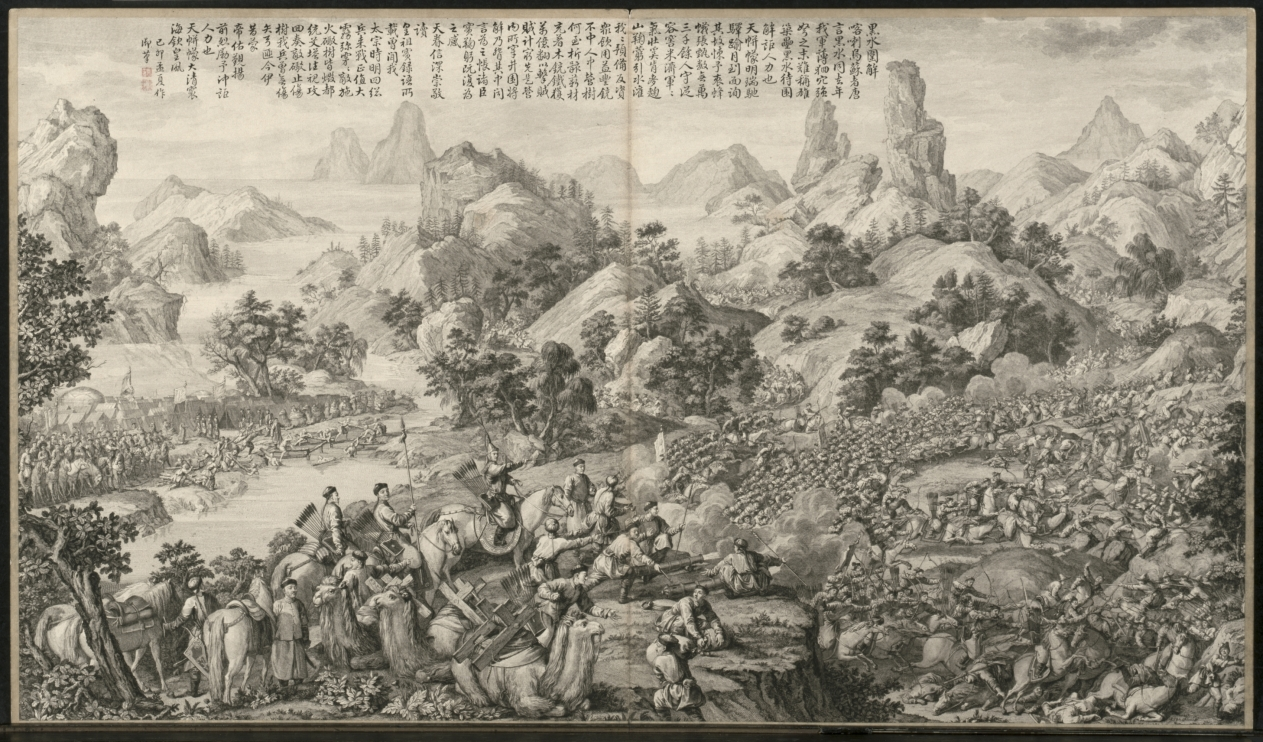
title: Breaking Through the Siege at Hesui: from Battle Scenes of the Quelling of Rebellions in the Western Regions, with imperial Poems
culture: China, Qing dynasty (1644–1911), Qianlong reign (1736–95)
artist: Giuseppe Castiglione (Italian, 1688–1766)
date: c. 1765–74; poem dated 1759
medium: etching, mounted in album form, 16 leaves plus two additional leaves of inscriptions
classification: Print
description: This set of etchings was commissioned by Emperor Qianlong to record in pictorial terms the courage of his generals and soldiers in quelling the rebellions in the Western Regions. Qianlong added his own poem to each of the etchings, indicating his appreciation and pride in this demonstration of military might. "Western Regions" refers to the present-day Xingjiang province, often described in Western writing as "Central Asia."